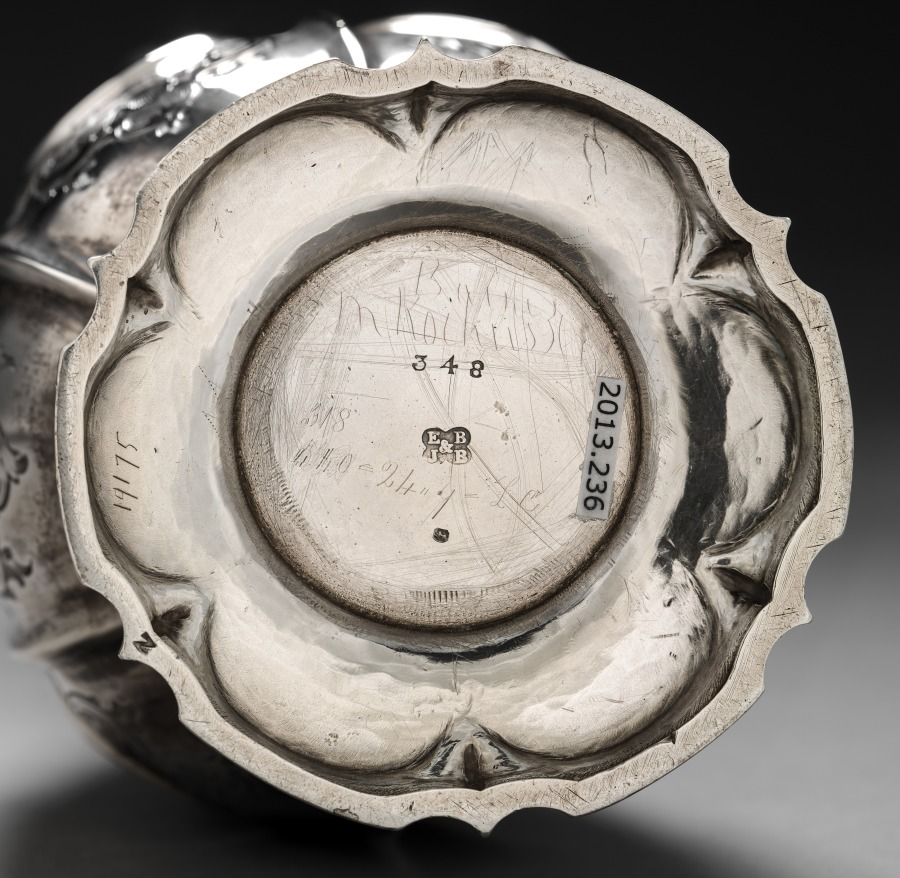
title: Pitcher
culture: England, 19th century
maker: Edward Barnard & Sons (British, c. 1680–2003)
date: c. 1870–80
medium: silver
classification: Silver